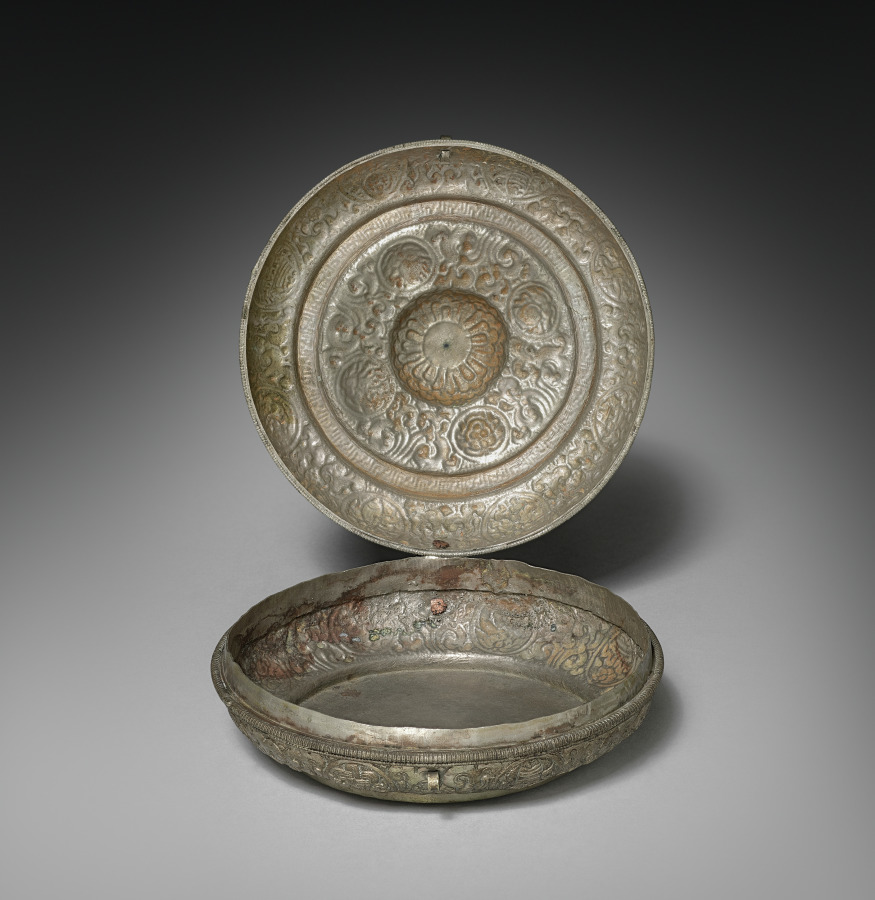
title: Betel Nut Box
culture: Tibet, 19th century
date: 1800s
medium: silver and enamel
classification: Metalwork